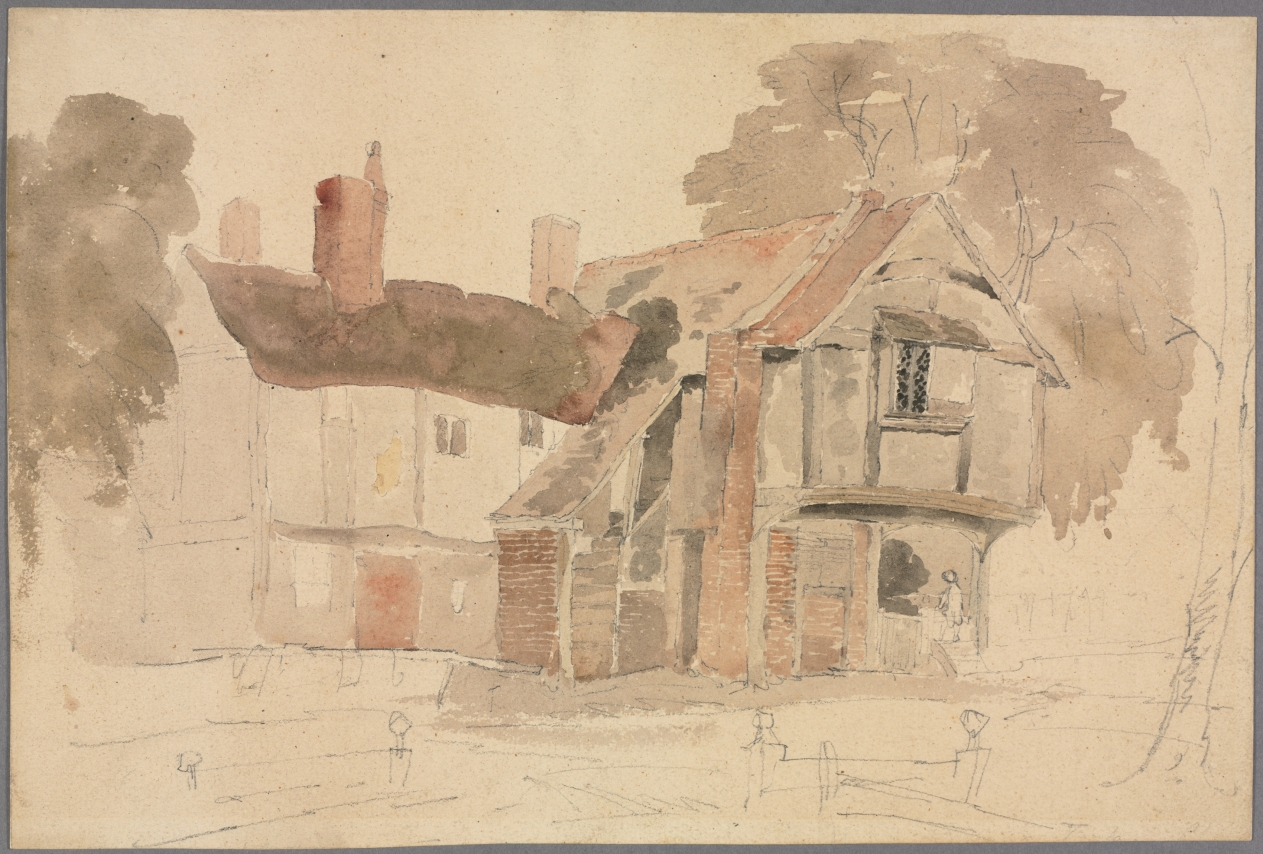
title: Bray Church Yard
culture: England, 19th century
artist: John Varley (British, 1778–1842)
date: 1807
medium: watercolor and graphite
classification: Drawing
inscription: inscribed, in graphite, on verso, at lower left: BrayChurch Yard - 1807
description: The inscription on the reverse of this drawing, "Bray Church Yard-1807," likely refers to St. Michael’s, the parish church in the village of Bray on the banks of the Thames in the county of Berkshire. The banks of the lower Thames Valley provided the subject matter for many of John Varley’s early watercolors. His pursuit of the picturesque led the artist to turn his back on London and its connotations of commerce and industry, focusing instead on the rural aspects of the scene.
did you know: Although rare, John Varley's early watercolors are considered his most inspired work.